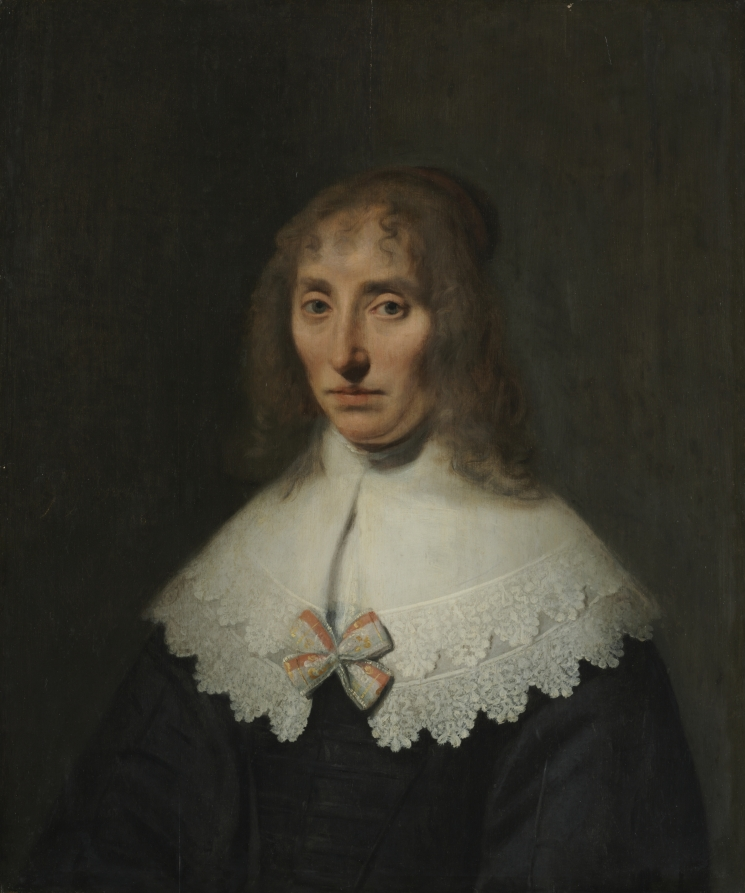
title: Portrait of a Woman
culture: Netherlands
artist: Govaert Flinck (Dutch, 1615–1660)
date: 1646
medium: oil on wood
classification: Painting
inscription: Signed left: "G. Flinck 1646"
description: Because of an inscription on the back, this painting was long considered a portrait of Anna Maria van Schurman, a prominent Dutch scholar and artist. These words, however, were added much later and incorrectly state that Anna Maria was 42 years old, when in reality she would have been 39. Furthermore, Flinck's likeness does not resemble other known portraits of this famous woman. Although her identity remains unknown, his sitter has an austere dignity and emotional complexity that captures her individuality through the careful description of her expression and dress. Due to this naturalism and elegant formality, Flinck achieved wealth and a high social standing throughout the 1640s as one of Amsterdam's most popular portraitists, rivaling his former master, Rembrandt. Joachim Sandrart, a contemporary German painter, once commented that compared to Rembrandt's portraits, Flinck's "were more felicitous in the exactness and in the pleasing quality of the portrayal."